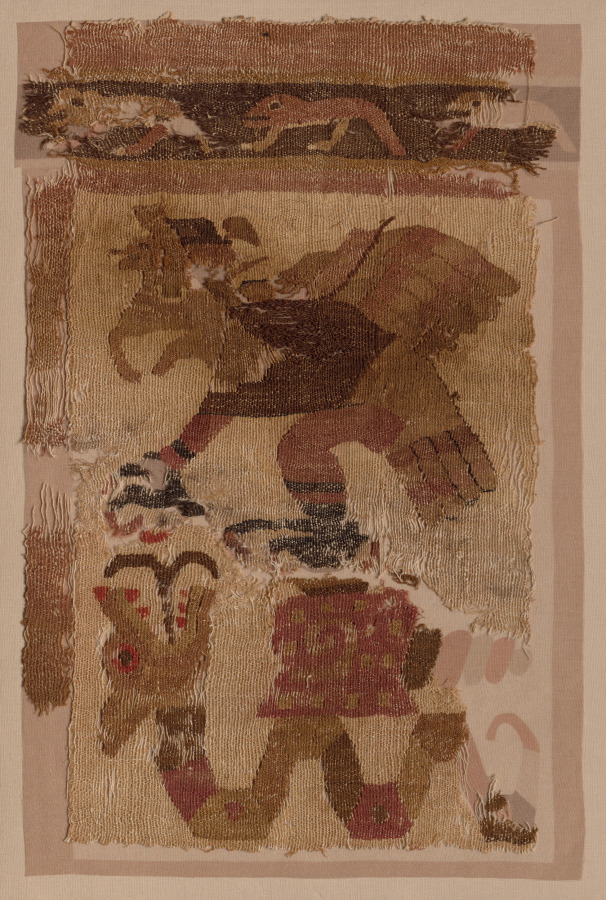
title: Textile Fragments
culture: Peru, Moche, north coast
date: c. 50–650 CE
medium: cotton and camelid fiber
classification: Textile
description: These fragments are rare survivors of catastrophic rains that destroyed much of the Moche textile legacy and may have helped to bring about the decline of Moche culture. Each depicts a serpent and a snail beneath a hovering raptorial bird—perhaps a snail kite, a type of hawk named after its favored food. The size of the motifs implies that the original textile was large; a mantle (a shawl-like garment) or a hanging are among the possibilities.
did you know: These fragments are rare survivors of floods that destroyed much of the Moche textile record.